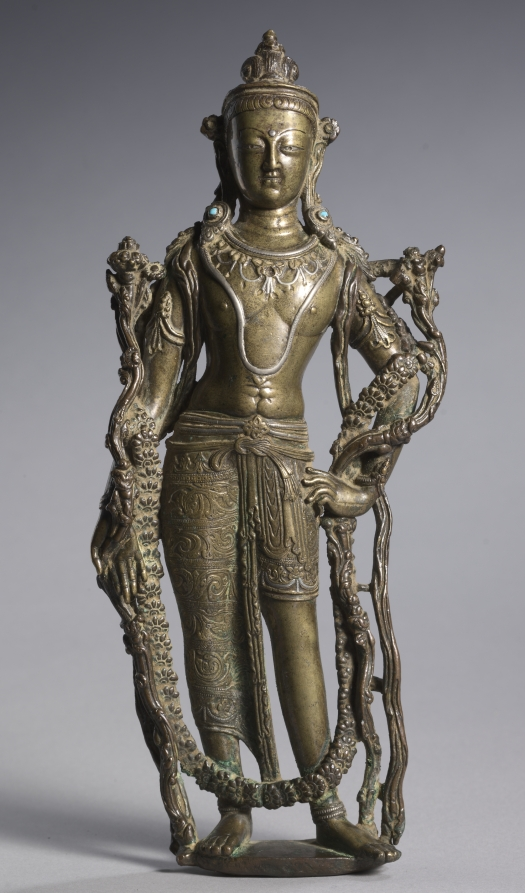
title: Bodhisattva Padmapani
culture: Western Tibet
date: 900s–1000s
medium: brass inlaid with silver and gold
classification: Sculpture